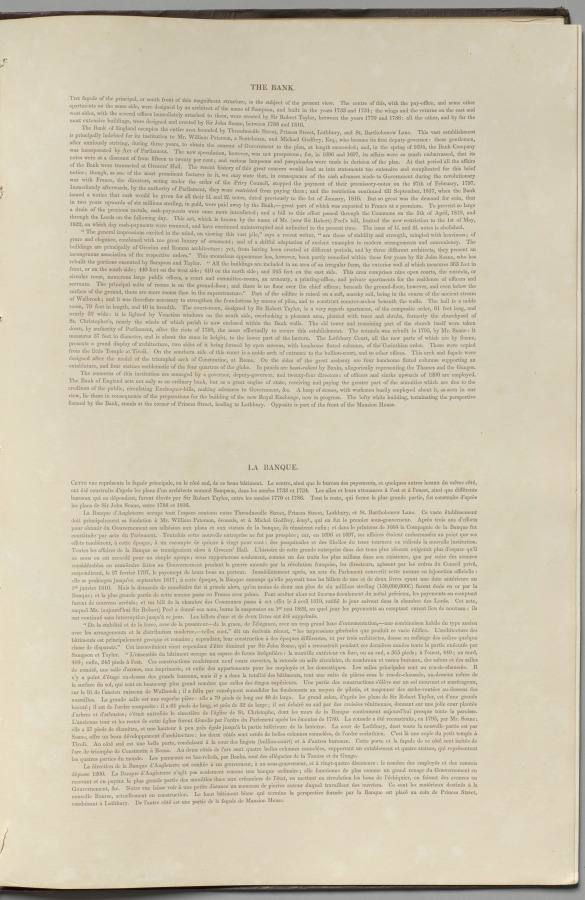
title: London As It Is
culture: England, 19th century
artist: Thomas Shotter Boys (British, 1803–1874)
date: 1842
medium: lithograph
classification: Bound Volume